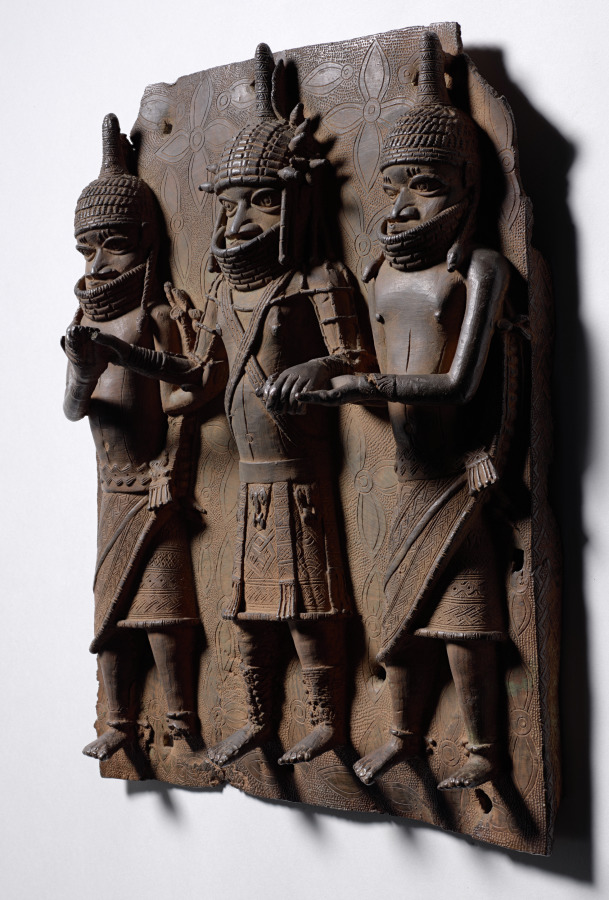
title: Plaque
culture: Nigeria, Benin Kingdom, Ẹdo peoples, members of the Igun Eronmwon (royal brasscasters) guild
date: 1500s–1600s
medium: Copper alloy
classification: Sculpture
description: Nearly 900 metal plaques once adorned the Ọba’s palace courtyard, documenting Benin’s history and customs. This one depicts two male attendants (enobore) supporting an Ọba. It uses hierarchical composition: important figures are large and centered. Everything about the Ọba is greater than his companions: their bodies, clothing, and jewelry. The flanking attendants physically support a man weighed down by heavy royal garments and responsibilities. Brasscasters skillfully cast their clasping hands projecting from the plaque. The bottom left number means the British Museum formerly owned this. It entered their collection in 1898, one year after British troops took it from a palace storeroom during the Siege of Benin.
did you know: Look at the side of this plaque. The designs on the slender edges are considered visual "signatures" of the different casters who made plaques for the Oba of Benin.